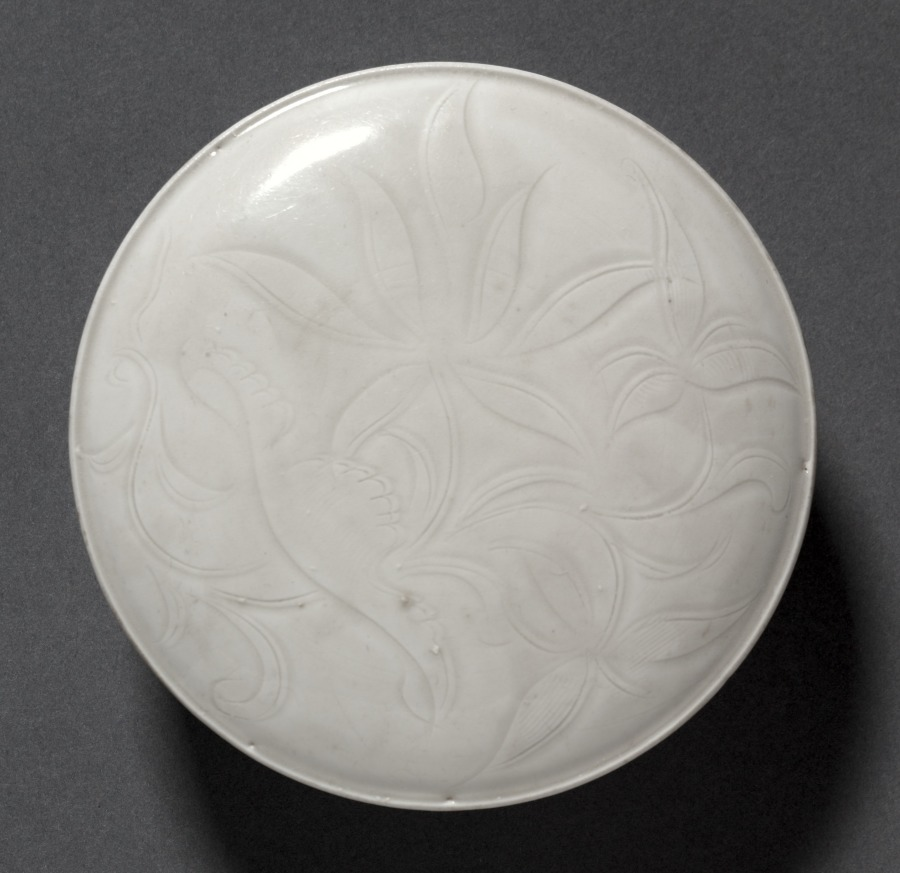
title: Covered Box (lid)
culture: China, Hebei province, Quyang, Northern Song dynasty (960-1127) to Jin dynasty (1115-1234)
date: 1100s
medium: cream-glazed porcelain with incised decoration, Ding ware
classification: Ceramic